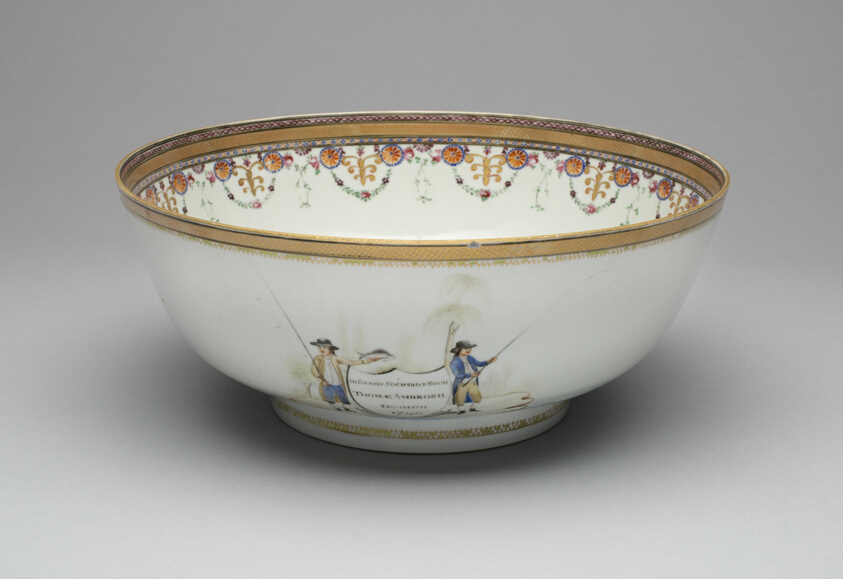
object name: Ceramics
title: Punch Bowl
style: chinese export, Chinese (culture or style), East Asian, asian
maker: China; Chinese, made for the American market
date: 1790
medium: Porcelain, enamel, and gilding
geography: China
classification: punch bowl; chinese export porcelain; art of the americas; porcelain; european decorative arts; ceramics; decorative arts; American market; pottery